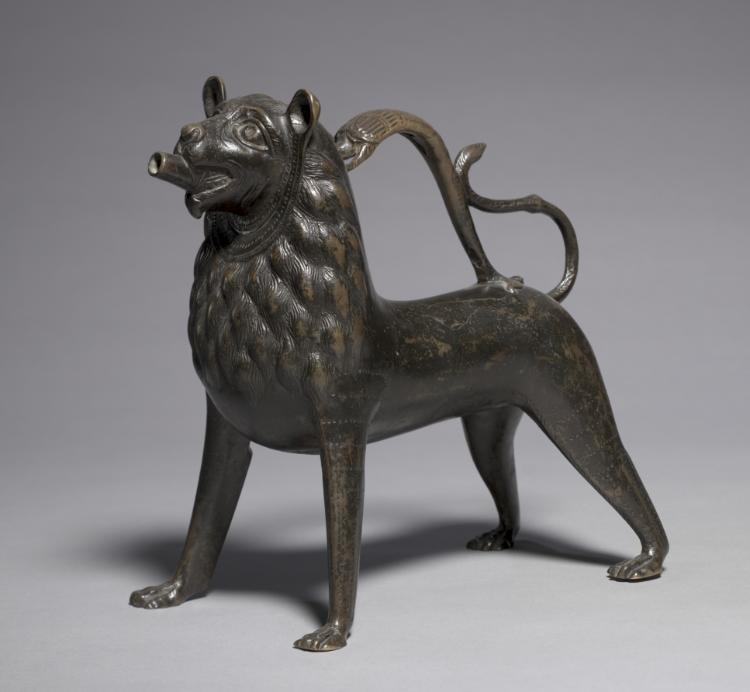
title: Lion Aquamanile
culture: Germany, Lower Saxony, Hildesheim, Gothic period, first half 13th century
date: 1200–1250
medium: bronze: cast, chased, and punched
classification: Sculpture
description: An aquamanile is a water vessel used for washing hands both at church altars and at the dinner tables of upper-class patrons. They often took the form of fantastic beasts such as dragons and unicorns or animals such as horses, birds, dogs, and lions, like this one.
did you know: The handle of this vessel is in the shape of a dragon with a long curving tail.